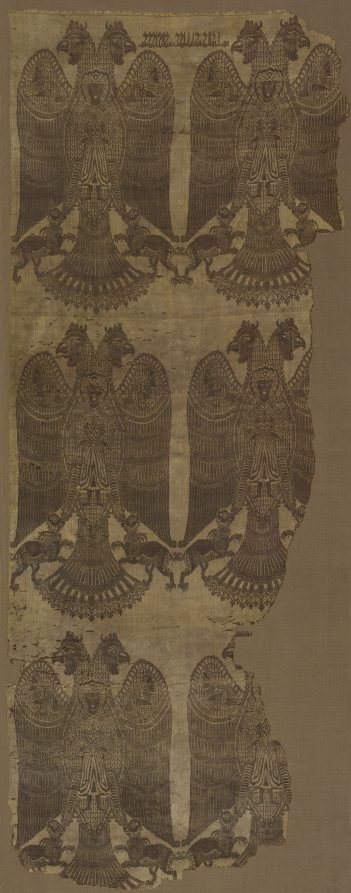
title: Fragment with Inscription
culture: Iran, in the style of the Buyid period (945–1055)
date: before 1962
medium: Silk: lampas weave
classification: Textile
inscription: On the wing of each small bird is an inscription: "al-rahmah" [mercy].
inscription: On the upper part of the arms of the small standing figure: "al-barakah" [blessing].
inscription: At top of textile: "baqayta amir al-mu'minin fa-innama baqa['u]ka hasan lil-zaman wa-tay-yib"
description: A design in dark brown on a background of dark tan preserves five nearly complete double-headed "eagles" and almost half of a sixth, arranged in aligned rows. Each eagle grasps griffins in its talons. Small birds decorate the shoulders of its wings, and on the wing of each small bird is inscribed with the word “mercy.” Superimposed on the eagle, as if being carried, is a small standing human figure which bears on the upper part of its arms the word “blessing.” At the top of the textile, a Kufic inscription repeats a line from the diwan, collected poetry, of al-Buhturi.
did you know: The top inscription is a line by poet Al-Walīd ibn Ubaidillah Al-Buḥturī (821-897).